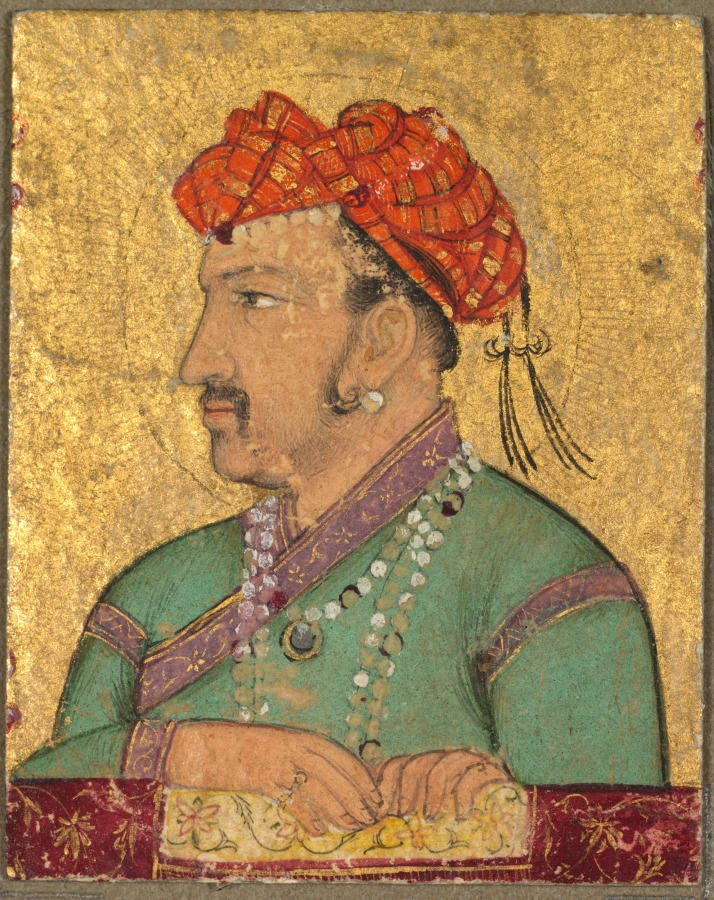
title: Portrait Jewel of Emperor Jahangir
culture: Mughal India, court of Jahangir (reigned 1605–27)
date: early 1600s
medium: Gum tempera and gold on paper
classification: Painting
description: The fourth Mughal emperor of India, Jahangir, had tiny portraits of himself made to give as gifts to his friends, family, and nobles of the court as a sign of royal favor. These portraits were mounted and worn as jewels or turban ornaments. The carpet or textile under his hands references the covered rail of a balcony where the emperor addressed the public three times a day to hear complaints or petitions.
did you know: The pearl earring denotes Jahangir’s affiliation with an order of Sufi mystics.